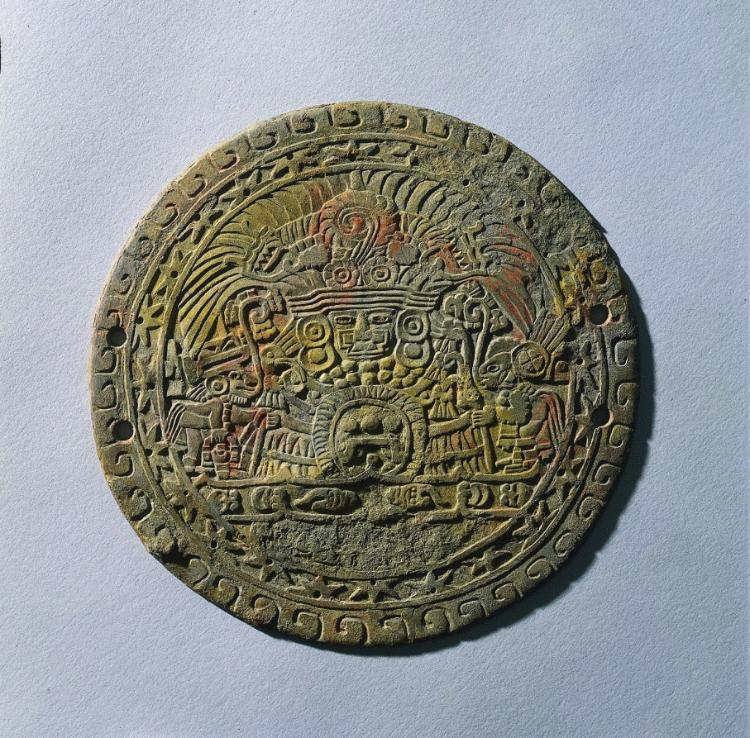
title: Mirror Back with Great Goddess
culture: Guatemala(?), Escuintla, Teotihuacán style, Classic Period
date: 400–550 CE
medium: slate, pigment; other side originally inlaid with polished pyrite mirror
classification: Sculpture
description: An important female deity commands the watery scene on the back of this mirror. The face, bordered by ear ornaments and partially hidden by a nose ornament, appears beneath a huge headdress with the fringed eyes and curled proboscis of an abstract butterfly. The deity rests on a shell-studded water band and two adoring humans offer flowers or incense in a bag. Mirrors served as costume ornaments and perhaps were used in rituals to divine the unknown.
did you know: This ancient Teotihuacan mirror may have been used in divination rituals.